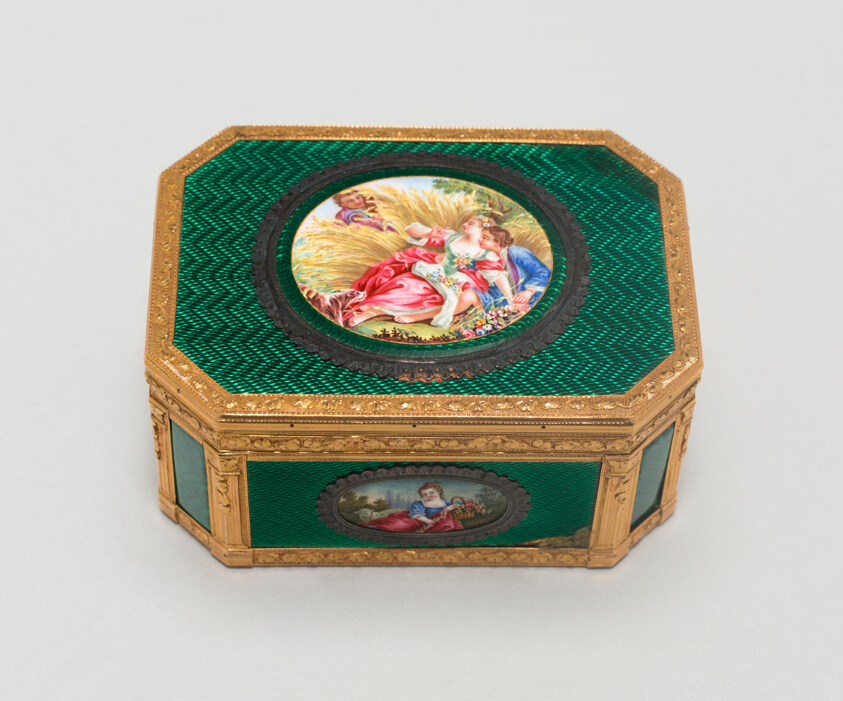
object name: Metalwork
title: Gold Box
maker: Pierre François Drais (French, active 1763-88)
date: 1770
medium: Gold, silver, and enamel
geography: France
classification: snuff box; european decorative arts; metalwork